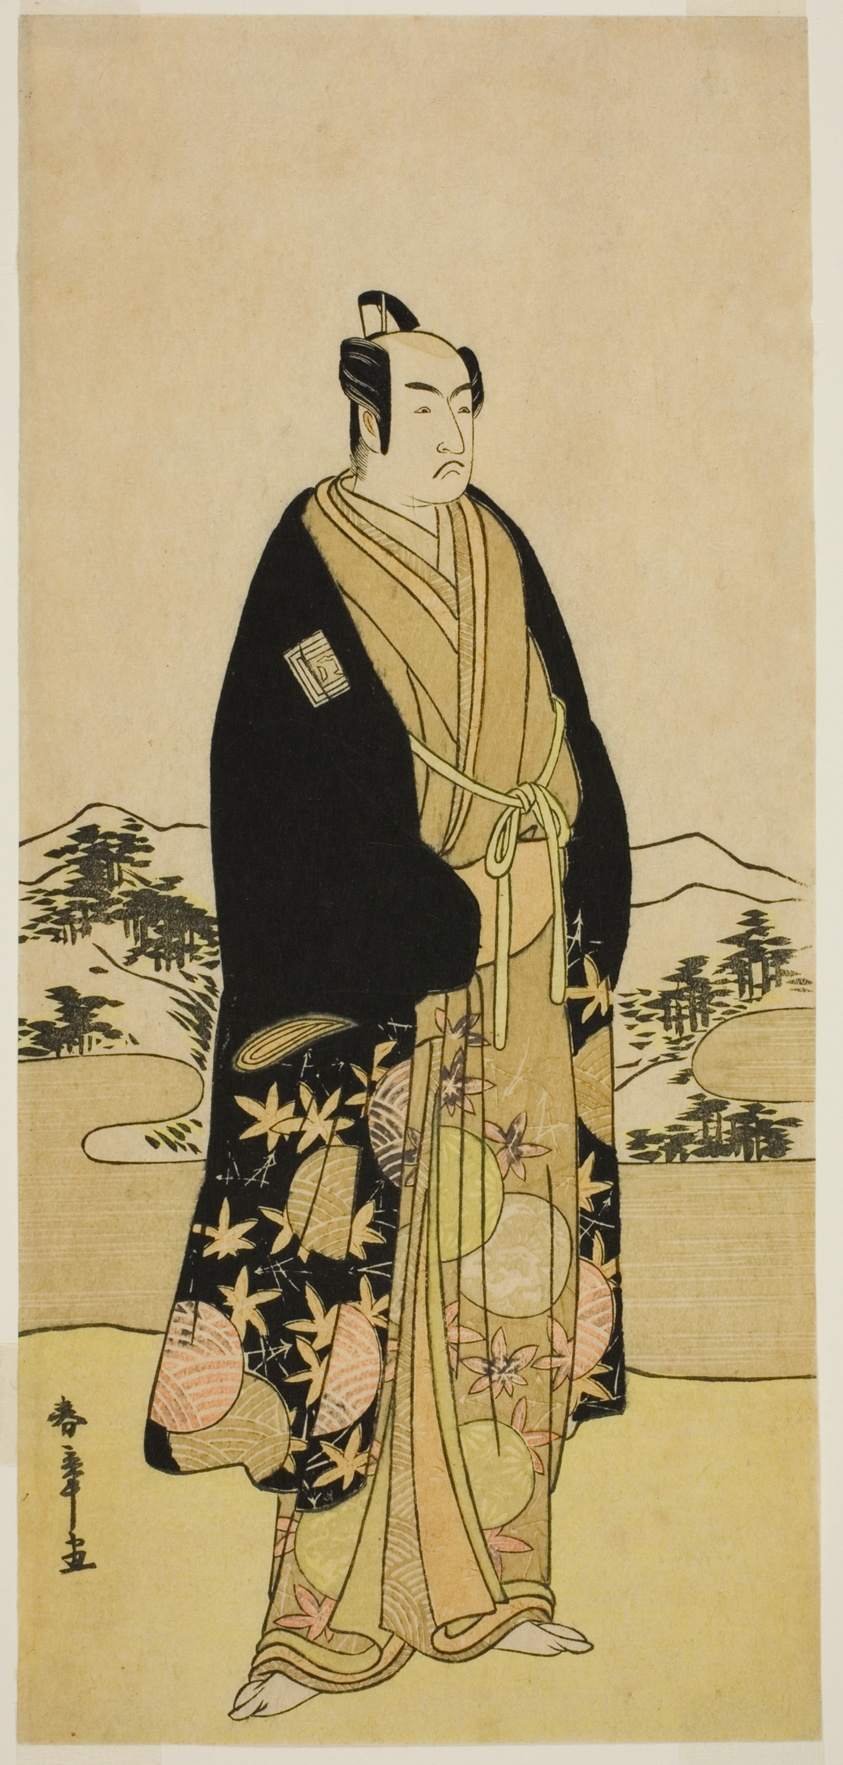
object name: Print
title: The Actor Ichikawa Monnosuke II in an Unidentified Role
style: Japanese (culture or style)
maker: Katsukawa Shunsho 勝川 春章; Japanese, 1726-1792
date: early 1780s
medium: Color woodblock print; hosoban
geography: Japan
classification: woodblock print; print; asian art